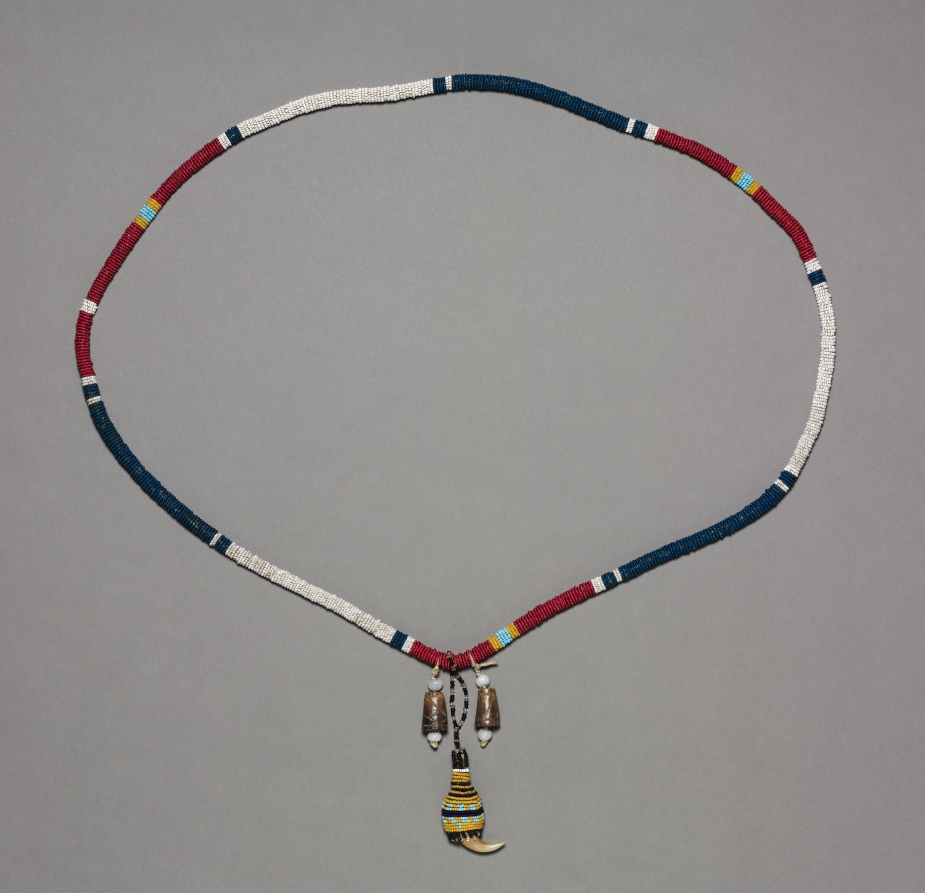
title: Beaded Necklace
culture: Africa, Southern Africa, South Africa, possibly Zulu-style maker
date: c. 1900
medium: Glass beads, probably plant fiber, sinew, horn beads, and claw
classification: Jewelry